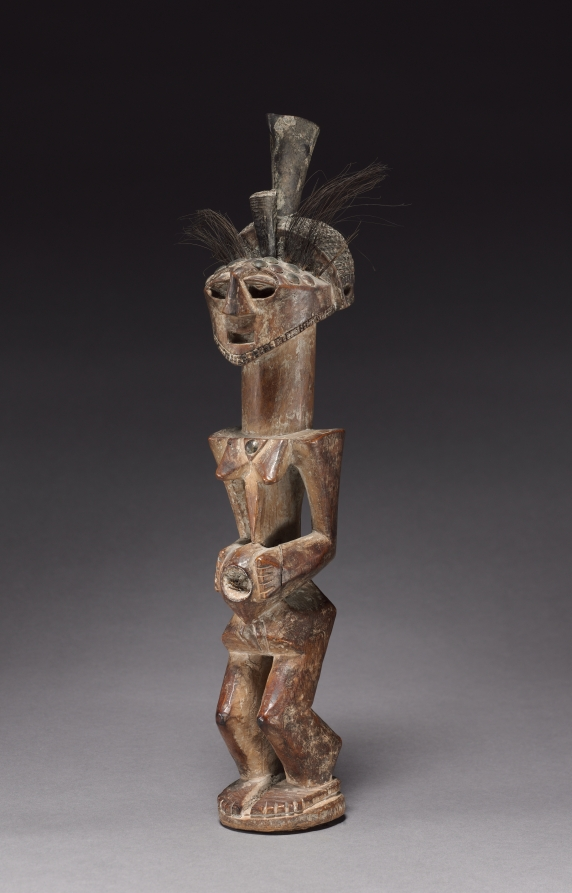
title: Female Figure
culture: Africa, Democratic Republic of the Congo, Songye people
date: late 1800s-early 1900s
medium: Wood, upholstery studs, antelope horns, and animal hair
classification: Sculpture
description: Mankishi figures were believed to have magical powers and were used by diviners to contact spirits in otherworldly realms. Smaller, personal power figures were used to connect with “common” ancestors, while the larger Mankishi figures contacted higher-ranking ancestral spirits. These power figures were kept in their own personal spaces because of their powerful status, and could only be handled by their designated nkunja, or guardian.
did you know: Because this Mankishi is neither small or quite large in size, it was most likely used by a family rather than an individual.